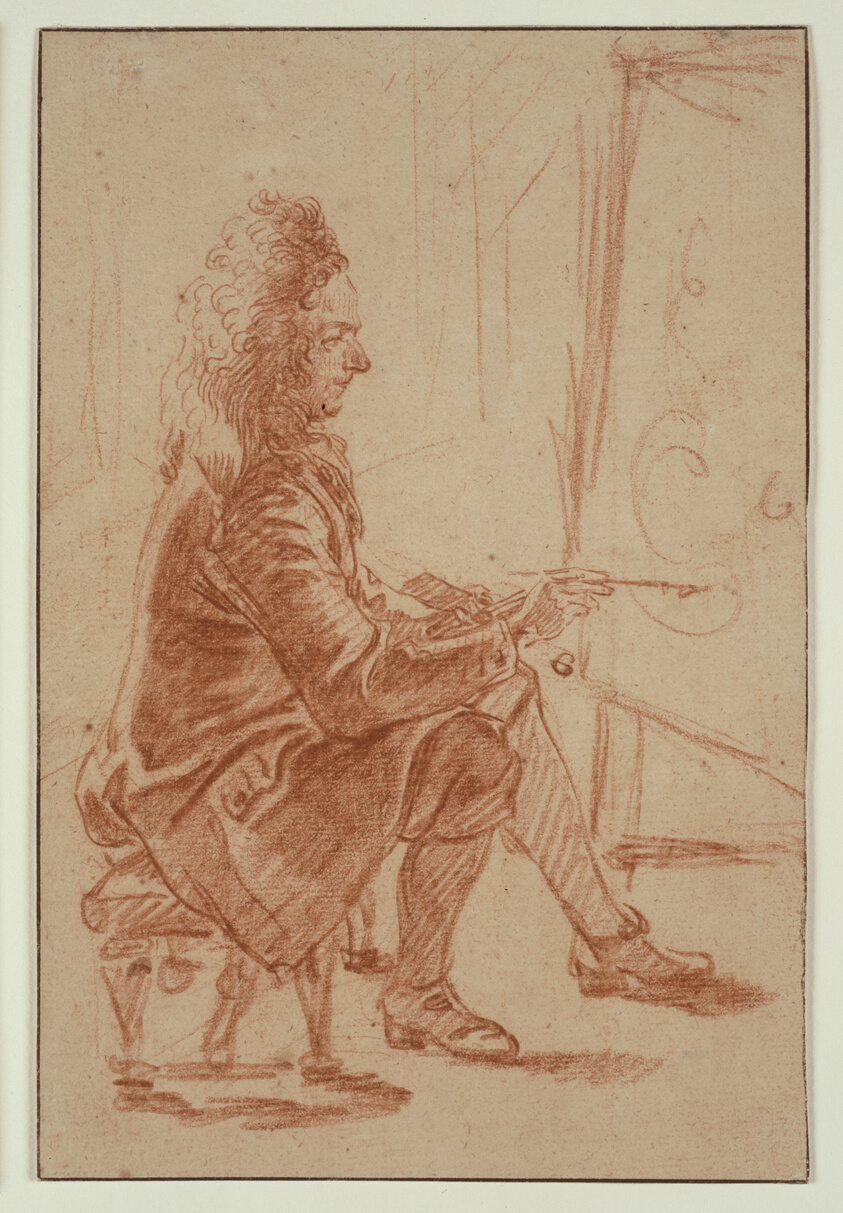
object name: Drawing and Watercolor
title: A Bewigged Painter (Possibly Claude Audran), Seated at his Easel, Seen in Profile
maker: Jean Antoine Watteau (French, 1684-1721)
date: c. 1709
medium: Red chalk on buff laid paper, laid down on cream laid card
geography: France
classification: chalk; drawings (visual works); prints and drawing